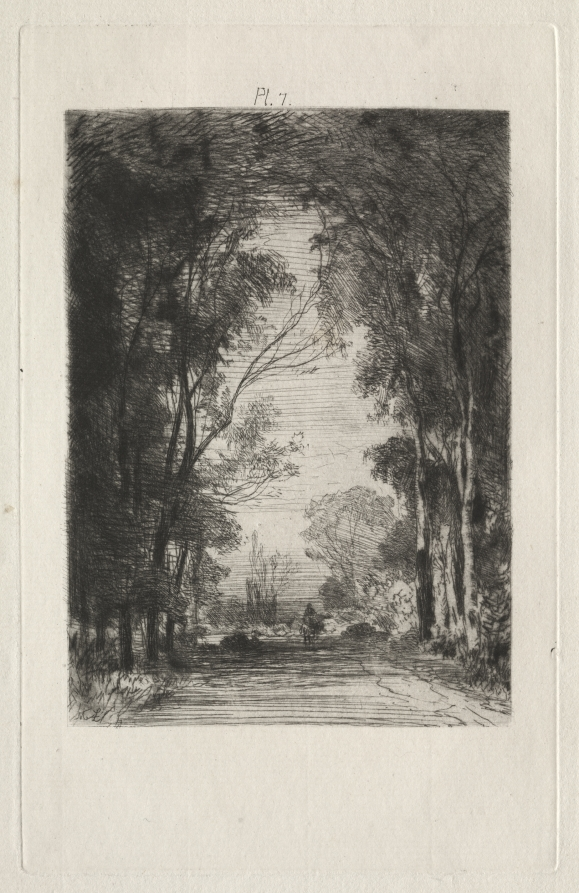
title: Traveler on a Road in a Forest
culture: France, 19th century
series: Plate 7, Traité de la Gravure à l'Eau-Forte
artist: Maxime Lalanne (French, 1827–1886)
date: 1866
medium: etching and drypoint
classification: Print